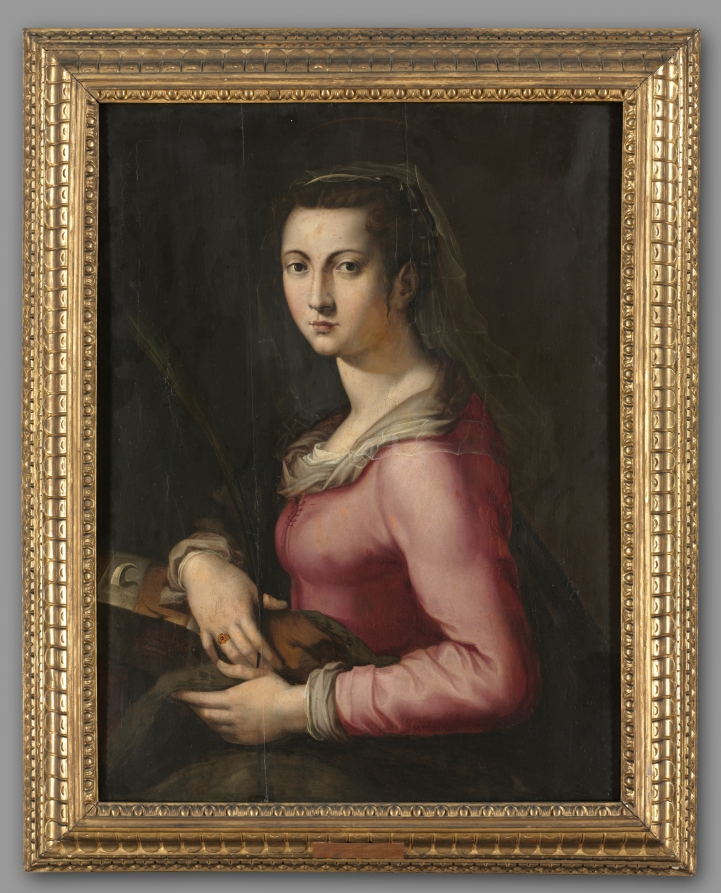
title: Portrait of a Woman as Saint Catherine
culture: Italy, 16th century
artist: Pier Francesco Foschi (Italian, 1502–1567)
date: c. 1560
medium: oil on wood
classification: Painting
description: Saint Catherine of Alexandria, a Christian, was martyred for refusing to make sacrifices to idols as decreed by the pagan Roman emperor Maxentius. While Maxentius first attempted to slay Catherine with spiked wheels, the machine broke when she prayed for salvation, and the emperor subsequently beheaded her. Catherine is identified in portraits through objects related to her martyrdom, such as a broken wheel, or a palm branch symbolizing the victory of the eternal spirit over mortal flesh. In sixteenth-century Florence, patrician women were often portrayed as such exemplary figures, indicating the virtues of the sitter.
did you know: The spiked wheel identifies this woman as the Christian martyr Saint Catherine.